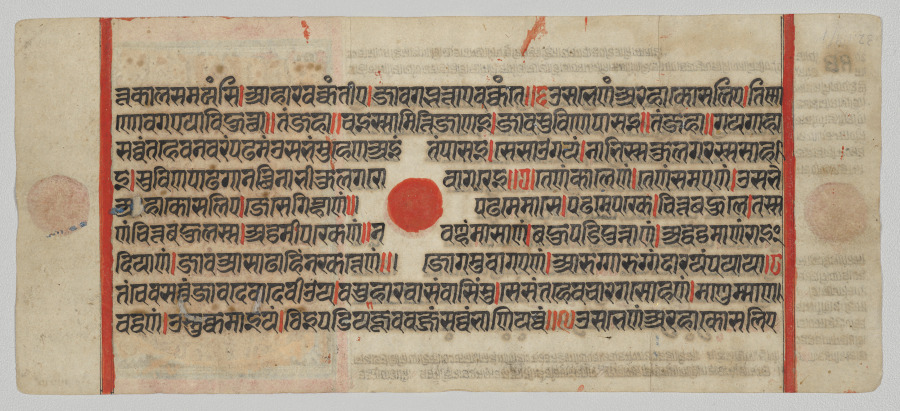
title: Text, Folio 54 (recto), from a Kalpa-sutra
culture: Western India, Gujarat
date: c. 1475–1500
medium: Gum tempera, ink, and gold on paper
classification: Painting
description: Followers of the Jain religion recognize 24 Jinas, individuals who reached liberation from the cycles of death and rebirth. Arishtanemi was the 22nd of the 24 and was a cousin of Krishna. Here Arishtanemi sits in eternal meditative bliss, crowned and bejeweled in a shrine. His attendants are sometimes recognized as the Hindu deities Krishna and Balarama. Followers of the Jain religion do not view Krishna as a supreme deity; instead, they view him and his brother Balarama as semidivine heroes with access to the liberated being.